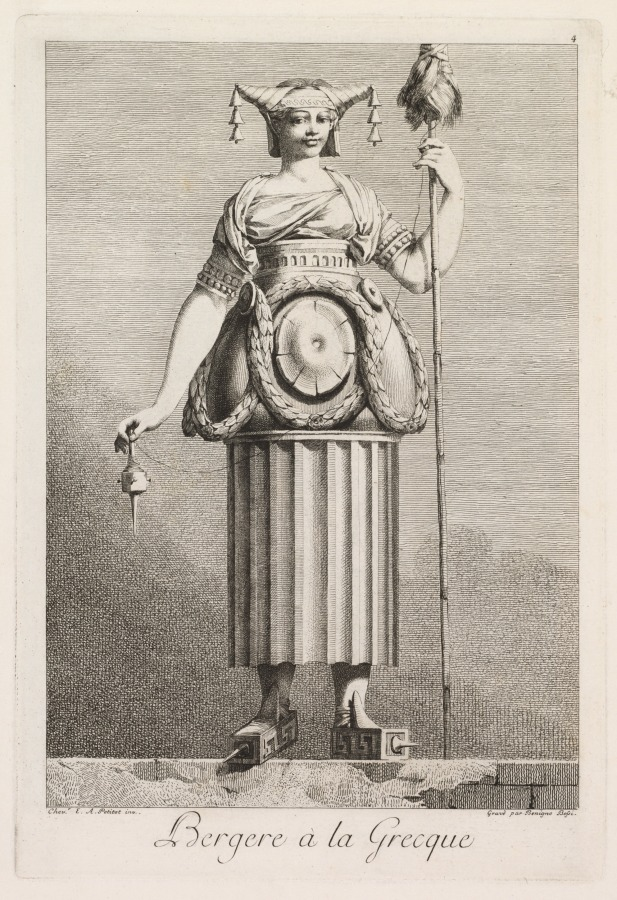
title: Shepherdess in the Greek Style, Plate 4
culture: Italy, 18th century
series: Mascarade à la Grecque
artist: Benigno Bossi (Italian, 1727–1792)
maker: after Ennemond Alexandre Petitot (French, 1727-1801)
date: 1771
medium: etching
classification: Print